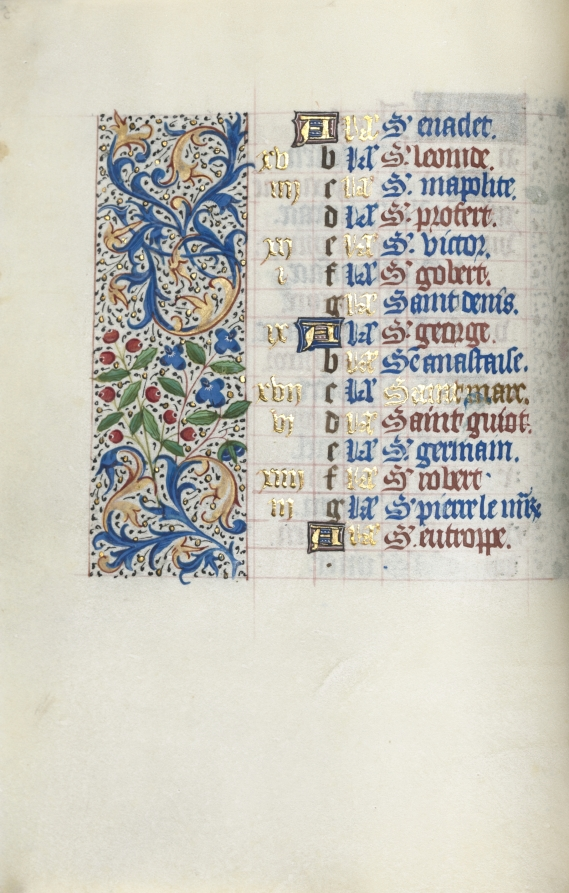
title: Book of Hours (Use of Rouen): fol. 4v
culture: France, Rouen, 15th century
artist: Master of the Geneva Latini (French, active Rouen, 1460–80)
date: c. 1470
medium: ink, tempera, and gold on vellum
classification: Bound Volume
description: In the late 1400s and early 1500s Rouen was an established and important center of book production. The city’s cathedral had a wealthy chapter that spent large sums of money to commission books and to maintain its extensive library. The stationers and booksellers would have likely been concentrated in or near the cathedral precinct. This artist, named after a manuscript now in Geneva, was Rouen’s principal illuminator during the second half of the 1400s.